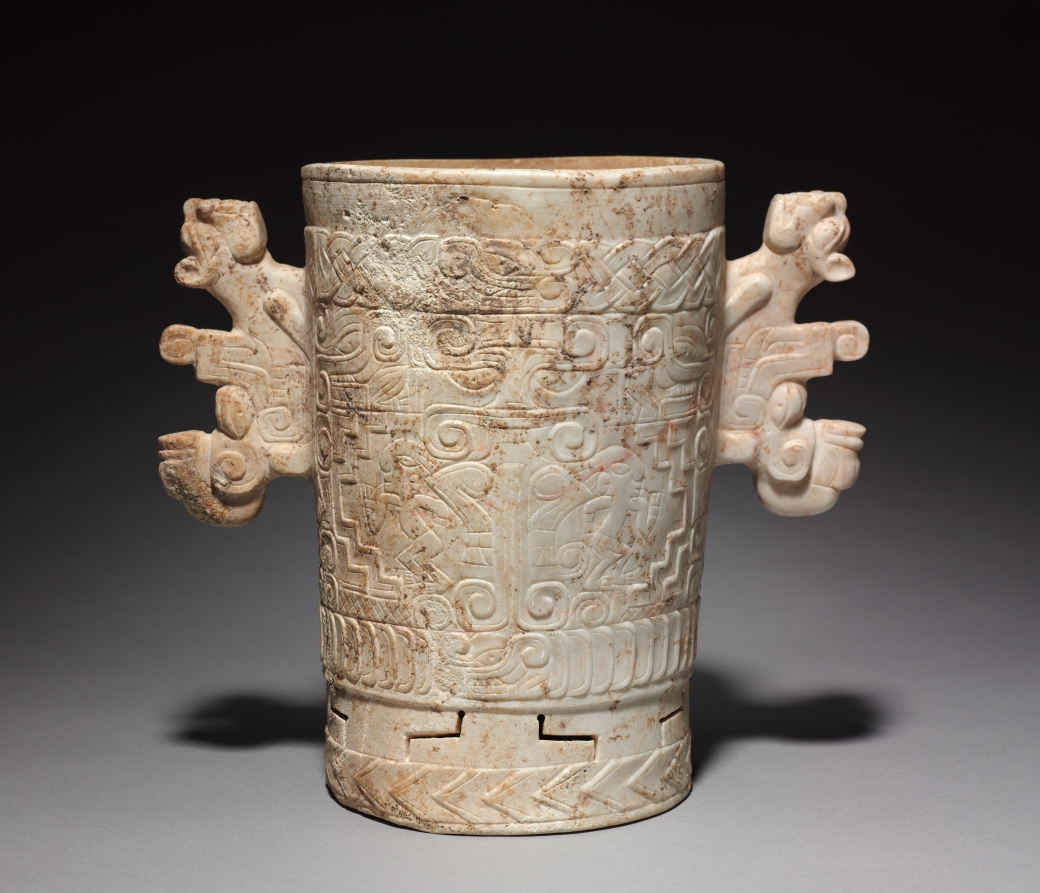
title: Carved Stone Vessel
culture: Northwest Honduras, Ulúa Valley, 8th-10th century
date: 700–1000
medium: marble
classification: Sculpture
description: This stone vessel, made by eastern neighbors of the Maya, is one of the finest and largest of its kind. On the exterior are several motifs that combine to create an unusually complex design that features a grotesque head, either in profile or front-facing, with a leg near its mouth. In the main panel a frontal version of the head hovers over two legs, the knees pointed sharply outward. Beside each leg is a lively human, rarely seen in such works. Little is known about the motifs’ meanings or the vessel’s use.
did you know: Carved in the round, the vessel's handles suggest a feline that emerges from a serpent-like head with an upturned snout.